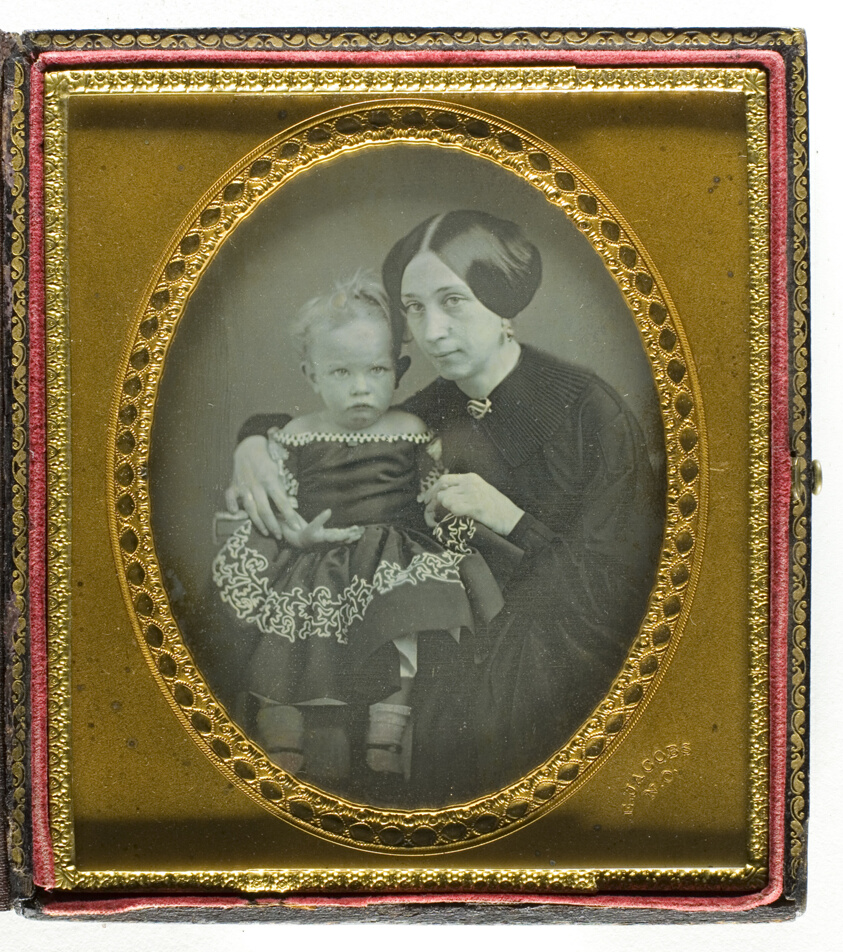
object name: Photograph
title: Untitled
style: 19th century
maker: E. Jacobs (American, 1813–1892)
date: 1844/64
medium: Daguerreotype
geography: United States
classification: daguerreotype; photographic process; photography; photograph